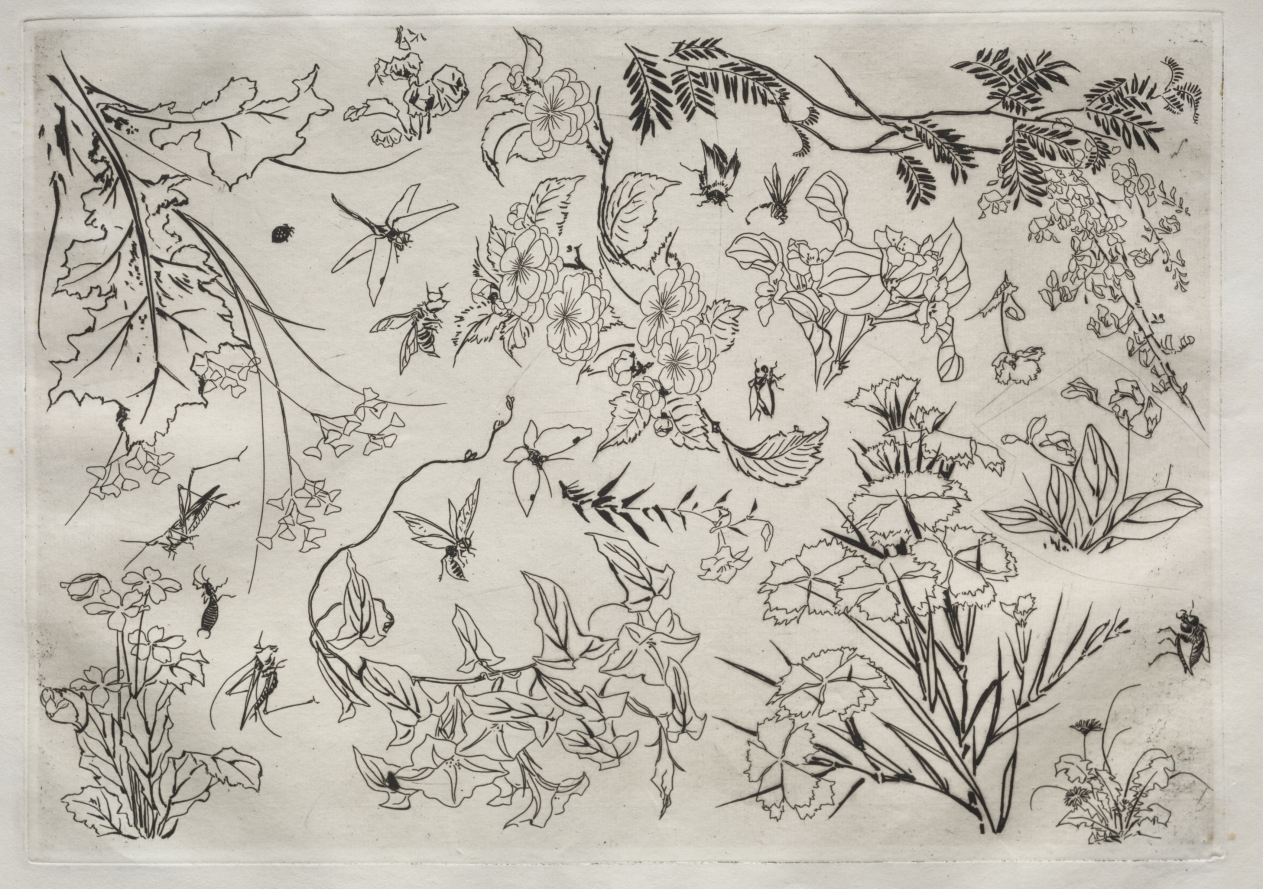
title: Dinner Service (Rousseau service): Flowers (no. 22)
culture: France, 19th century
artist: Félix Bracquemond (French, 1833–1914)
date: 1866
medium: etching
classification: Print